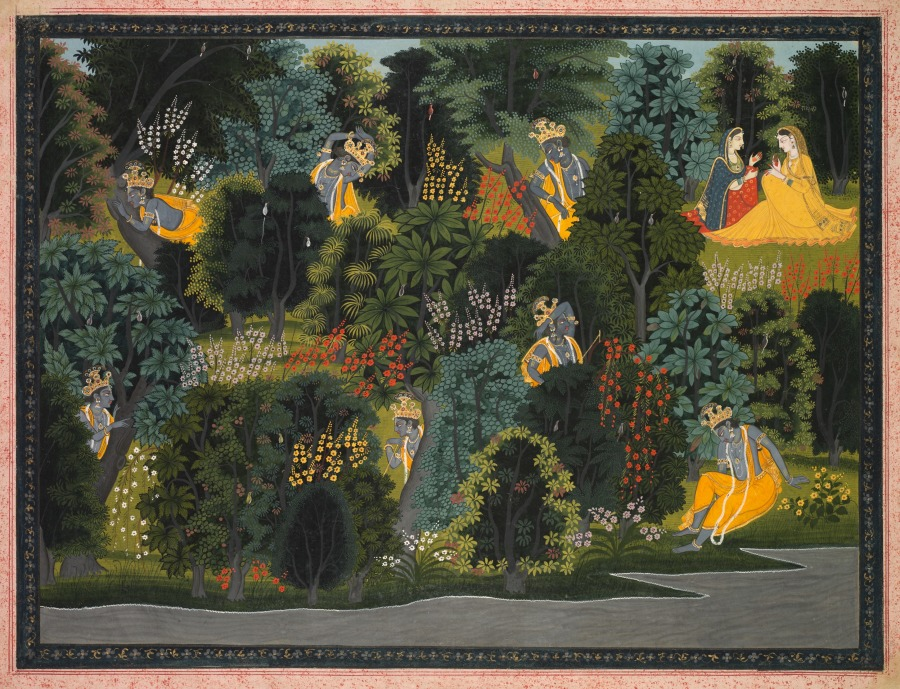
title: Krishna’s longing for Radha, from a Gita Govinda (Song of the Cowherd) of Jayadeva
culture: Northern India, Pahari kingdoms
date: c. 1820–25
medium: Gum tempera and gold on paper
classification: Painting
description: In the lush forests on the banks of India’s Yamuna River, the youthful god Krishna waits to rendezvous with his beloved Radha. The artist has rendered his impatience by showing seven Krishnas, in various attitudes of anxious waiting, as though seeing him over a period of time. Meanwhile Radha, dressed in yellow at top right, confers seemingly endlessly with her confidante, as she tries to decide whether she should meet Krishna for the illicit tryst—she is already married and Krishna is prone to flirting with other girls. This scene is a metaphor for how god waits for us to come to him, while the human devotee frets about the bonds of social norms.